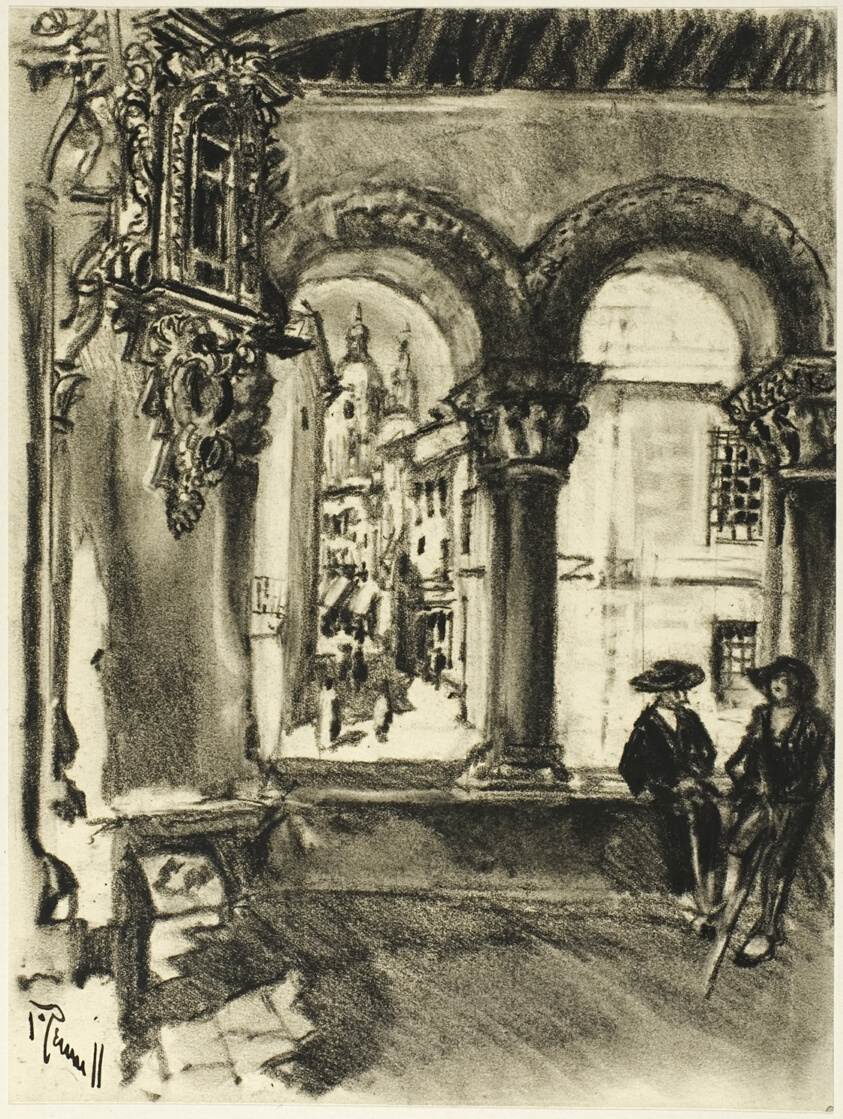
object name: Drawing and Watercolor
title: Portico San Martín, Segovia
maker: Joseph Pennell (American, 1857-1926)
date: c. 1903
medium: Oiled charcoal with stumping and erasing, on cream wove paper, perimeter mounted on off-white wood pulp laminate board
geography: United States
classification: charcoal; drawings (visual works); prints and drawing